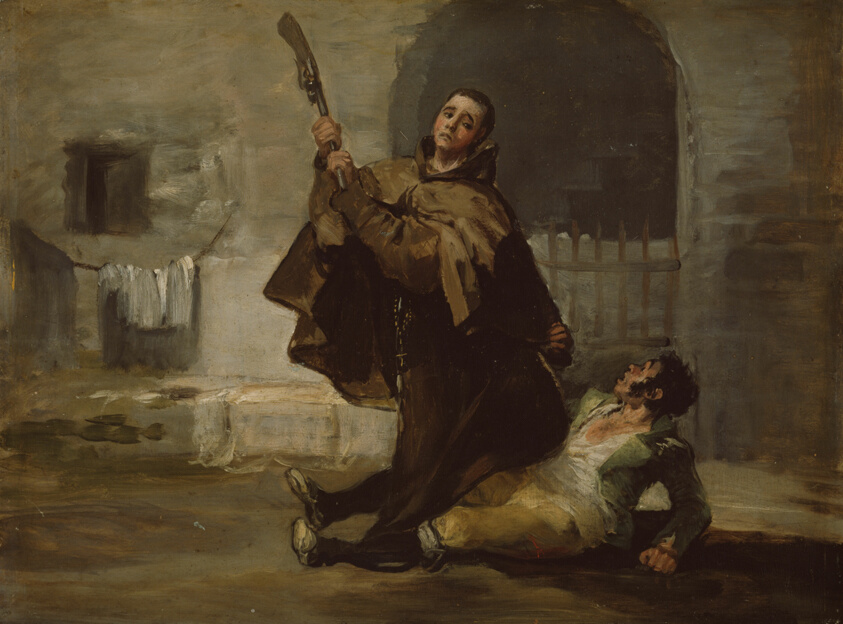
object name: Painting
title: Friar Pedro Clubs El Maragato with the Butt of the Gun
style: nineteenth century, 19th century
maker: Francisco José de Goya y Lucientes (Spanish, 1746–1828)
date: c. 1806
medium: Oil on panel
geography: Spain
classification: painting; oil paintings (visual works); narrative; oil on panel; paint; spanish; european painting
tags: Narrative, brown (color), exterior, friars, men, people, Spain, violence, Century of Progress, world's fairs, Chicago World's Fairs